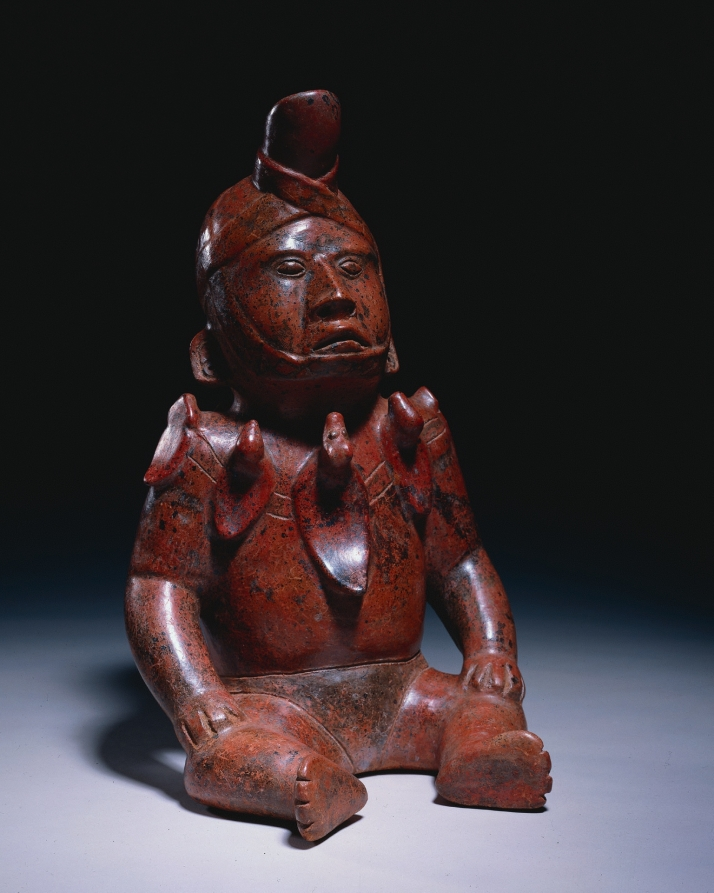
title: "Horned" Male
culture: West Mexico, Colima, Comala style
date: 100 BCE–300 CE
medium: earthenware with colored slips, black burial deposits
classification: Sculpture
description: This figure’s concentrated, otherworldly expression is emphasized by the hornlike element strapped to its forehead. This "horn" may be the spire of a conch shell, which comes from water and, therefore, refers to fertility—likely an important ritual concern of West Mexican chiefs. The element also could represent the "horn of power" worn in some areas of the world by shamans, the spiritual leaders and healers of small, nonindustrial societies.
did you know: This figure’s “horn” may be the spire of a conch shell, a reference to fertility.